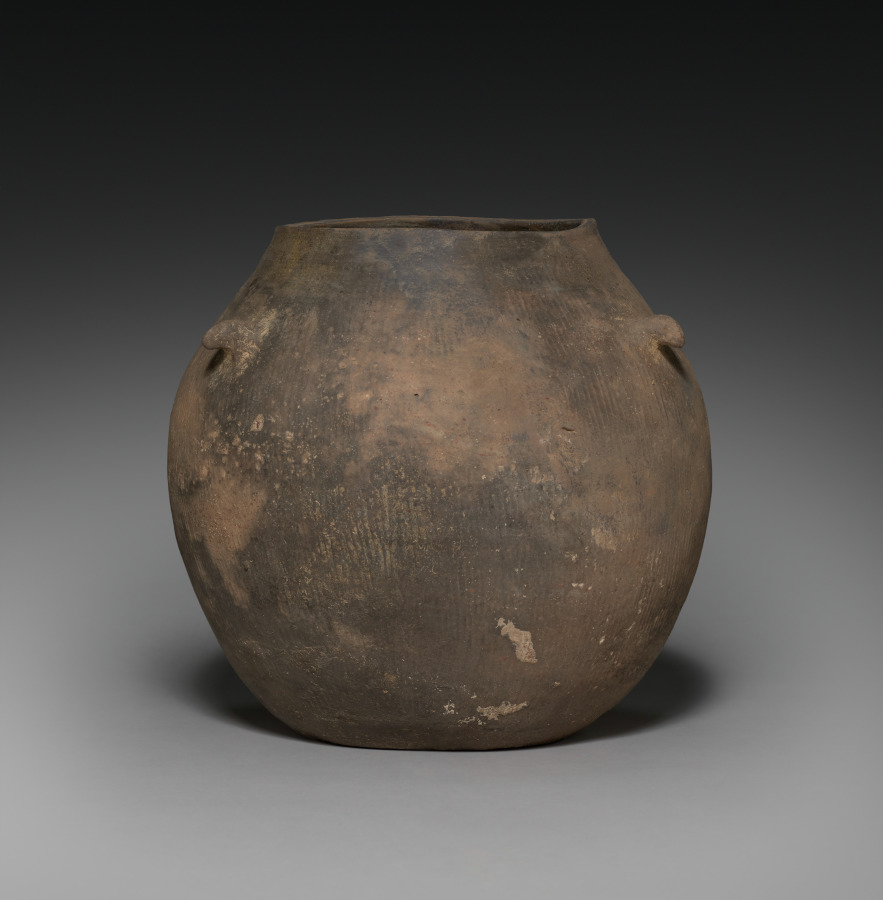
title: Lidded Jar with Four Horn Lugs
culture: Korea, Gaya period (42–562 CE)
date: 200s–400s CE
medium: earthenware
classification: Ceramic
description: Closed kilns built on hillsides became widely used for producing this type of pottery vessel in Korea during the Three Kingdoms period. Both its gray color and shimmering glaze are the result of the reduction of oxygen in the closed kiln chamber built on hillsides.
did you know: This pottery vessel served to contain cremated remains, indicating the popularity of Buddhist mortuary practice in Korea during the Three Kingdoms period.